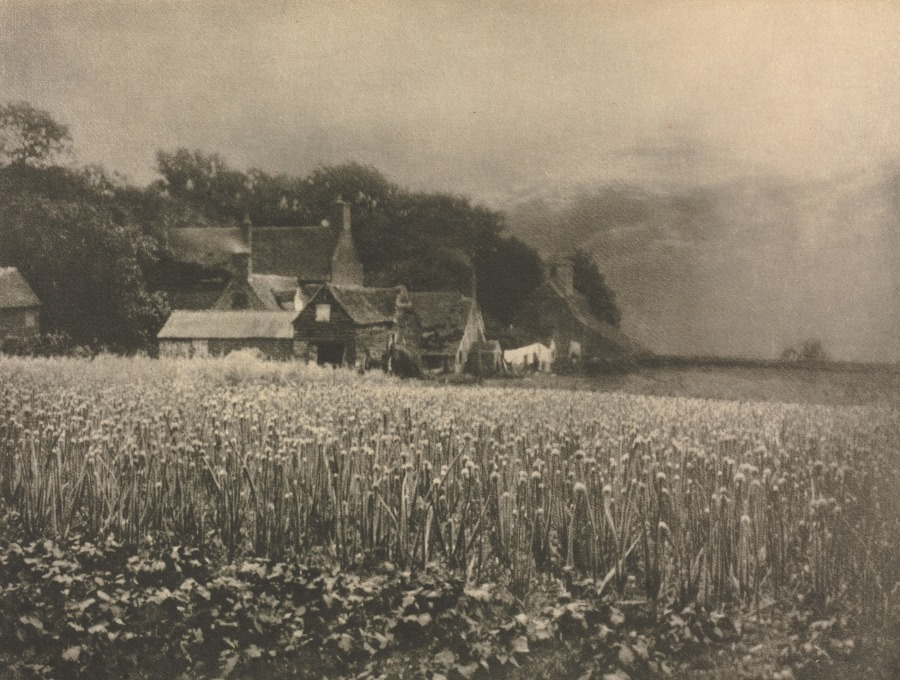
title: Camera Work: The Onion Field - 1890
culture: England, 19th century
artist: George Davison (British, 1856–1930)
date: 1890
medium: photogravure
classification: Bound Volume